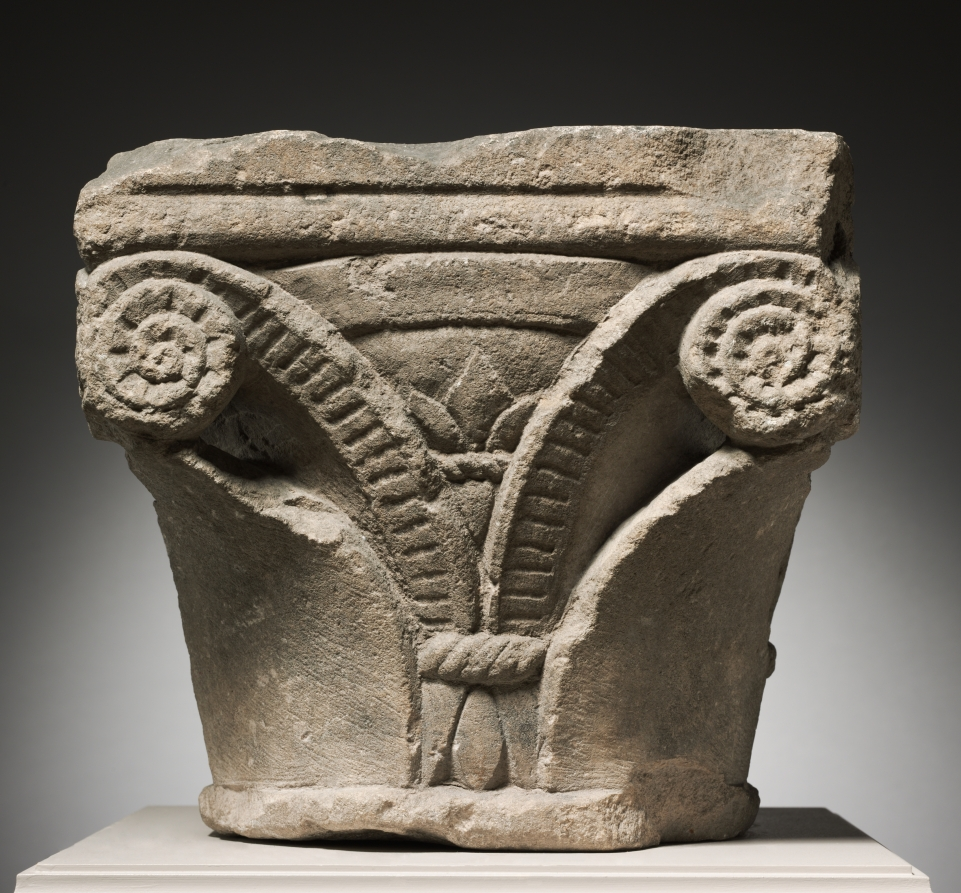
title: Capital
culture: Italy, Migration period, 8th-9th Century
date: 700s-800s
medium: marble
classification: Sculpture